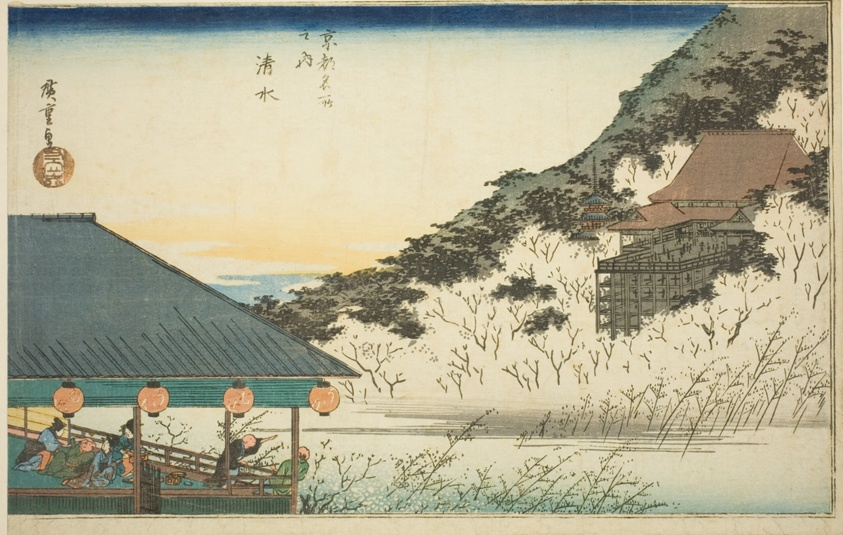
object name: Print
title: Kiyomizu Temple, from the series "Famous Places in Kyoto (Kyoto meisho no uchi)"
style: Japanese (culture or style)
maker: Utagawa Hiroshige 歌川 広重; Japanese, 1797-1858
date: c. 1834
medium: Color woodblock print; oban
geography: Japan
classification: woodblock print; print; asian art